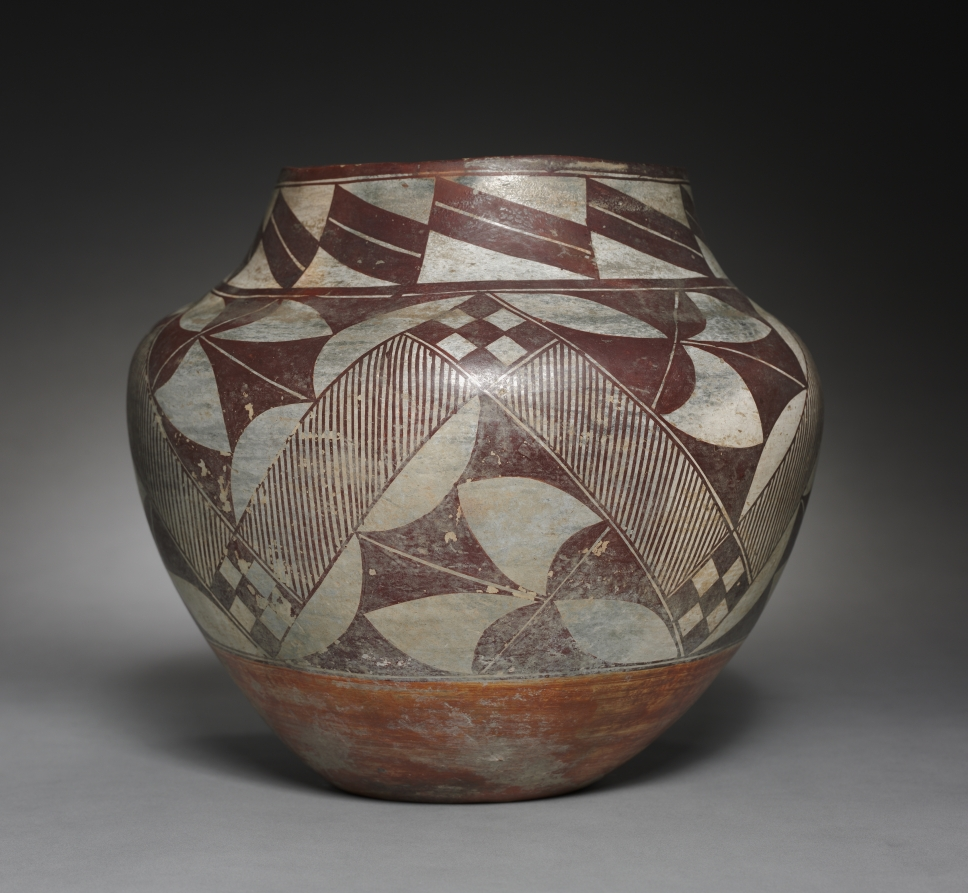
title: Water Jar (Olla)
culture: Native North America, Southwest, New Mexico, Acoma Pueblo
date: 1880s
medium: ceramic, slip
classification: Ceramic